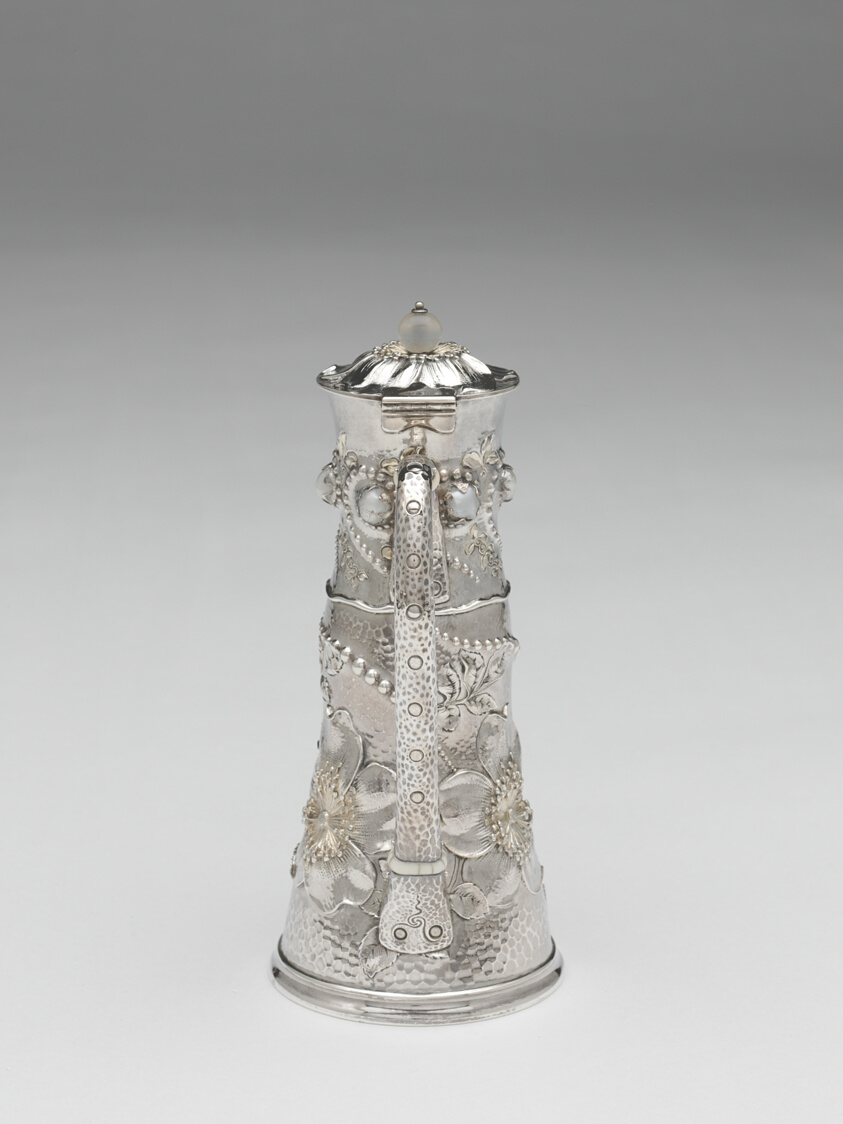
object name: Metalwork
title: Coffee Pot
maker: Design attributed to Charles Osborne (American, 1847–1920); Tiffany and Company (American, founded 1837); New York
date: 1881–89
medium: Silver, pearls, chalcedony, and ivory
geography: New York City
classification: coffeepot; silver; american decorative arts; american arts; decorative arts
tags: dining, drinking